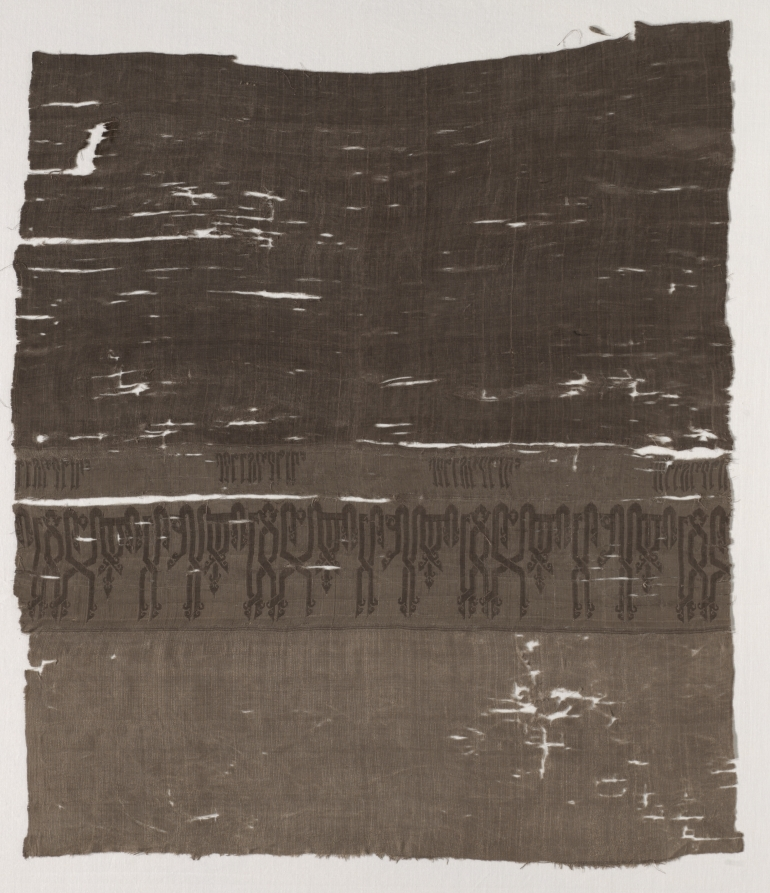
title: Fragment with Inscription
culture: Iran, in the style of the Buyid period (945–1055)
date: before 1968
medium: Silk: compound tabby and broken twill weave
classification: Textile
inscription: ya anis man la anis lahu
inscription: wa-ya aman man la aman lahu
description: On a plain golden tan ground is a dark band containing two rows of a plaited Kufic inscription woven in the weft direction. The golden tan lettering within each band is oriented in the warp direction. The upper inscription row is three times larger than lower. The plain area below the inscription band and the inscription band are woven in compound tabby. The plain area above inscription band is woven in 3/1 broken twill.